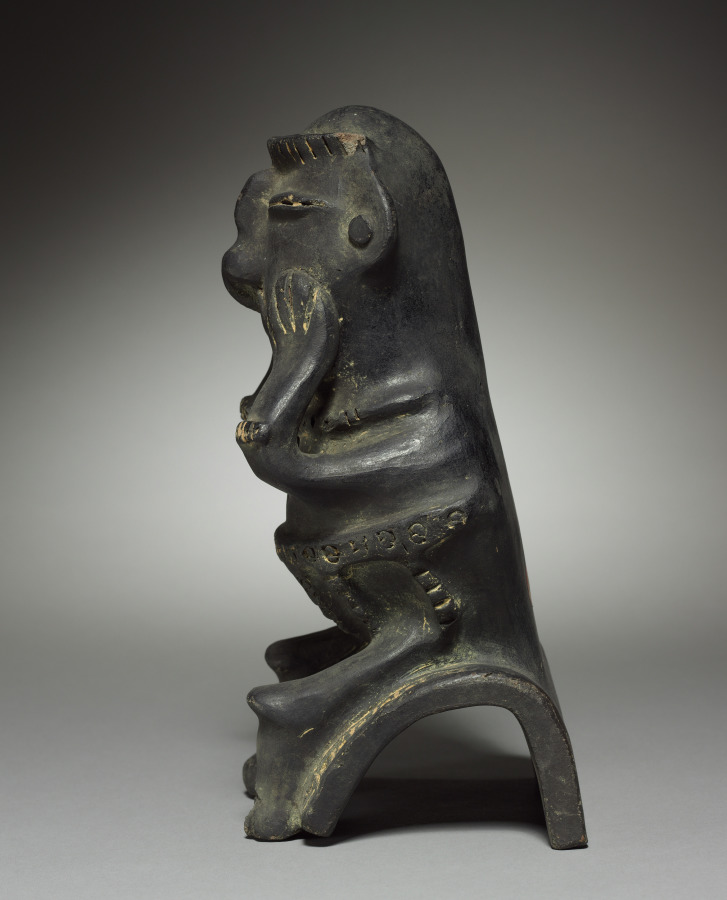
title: Seated Figure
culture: Colombia, Pre-Columbian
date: before 1921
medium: earthenware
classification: Ceramic